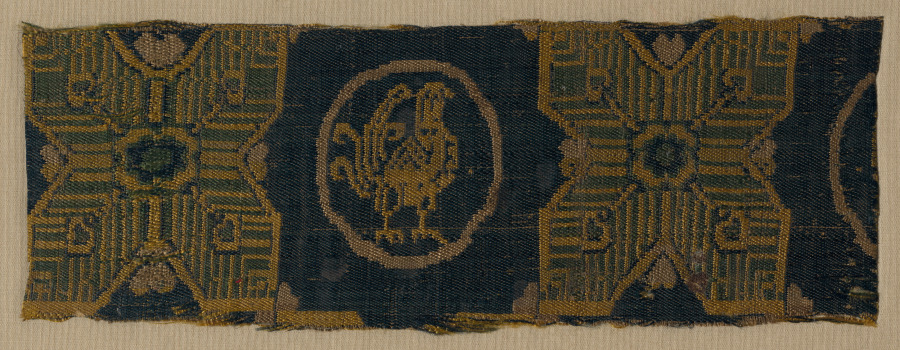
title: Star and Cross Pattern from a Tomb Cover(?)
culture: Byzantium, Islamic or Byzantine periods, 9th -10th Century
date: 800s–900s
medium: complementary weft-faced plain weave with inner warps (samit); silk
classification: Textile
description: This fragment is one of several that may have come from a tomb in the Caucasus (the region between the Black and Caspian seas). The design displays rows of eight-pointed stars, here with a rooster on a blue ground, alternating with striped pointed crosses.